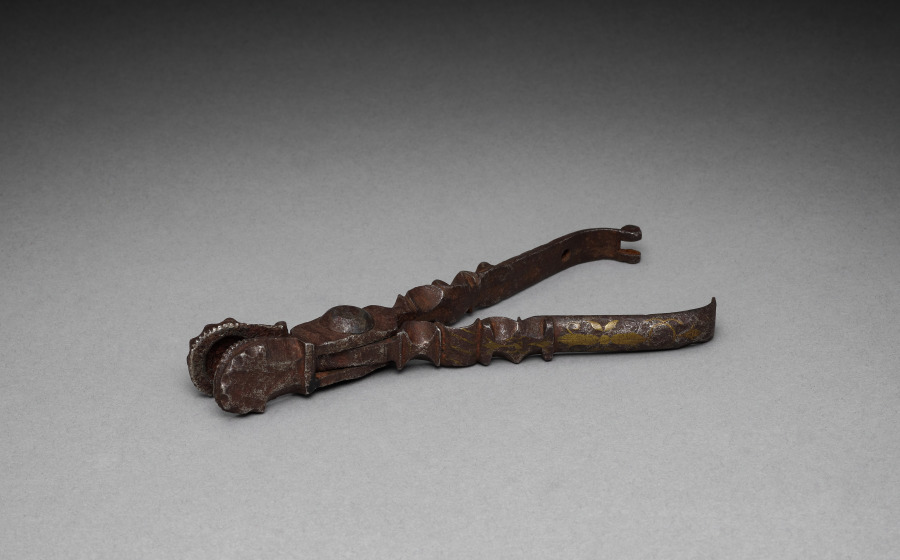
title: Bullet-mould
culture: Unassigned, early 18th Century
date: c. 1700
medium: steel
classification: Arms and Armor